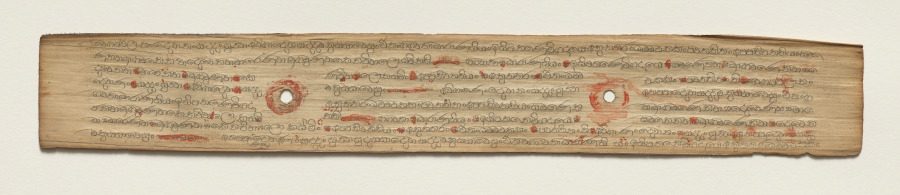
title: Leaf from a Buddhist Manuscript (verso)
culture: Sri Lanka, Singhalese, Late 17th century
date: c. 1700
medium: fiber paper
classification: Manuscript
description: Palm leaf material is still used for manuscripts in Sri Lanka. The palm leaves are prepared first by boiling them, drying them in the sun, and then rubbing them with oils. Scribes then use a metal stylus to incise the text. Then charcoal powder is wiped across the pages, filling in only the inscribed lines.